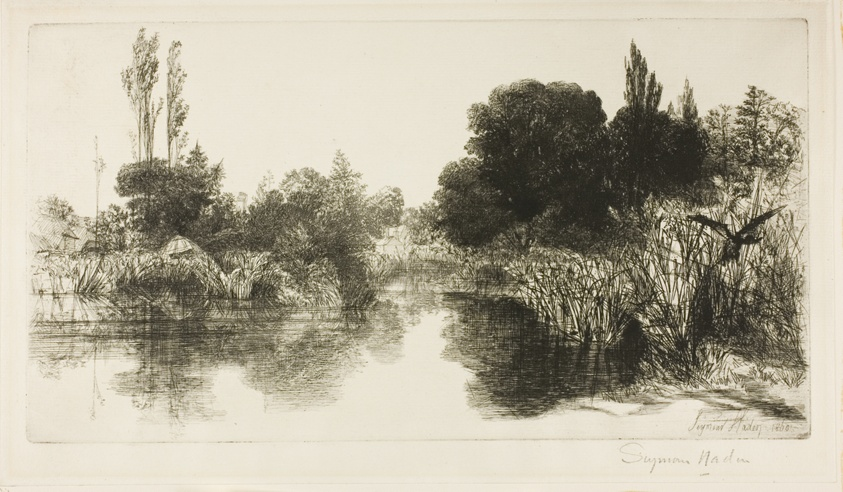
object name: Print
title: Shere Mill Pond, No. II (large plate)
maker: Francis Seymour Haden (English, 1818-1910)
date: c. 1860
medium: Etching with drypoint on ivory laid paper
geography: England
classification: etching; print; prints and drawing